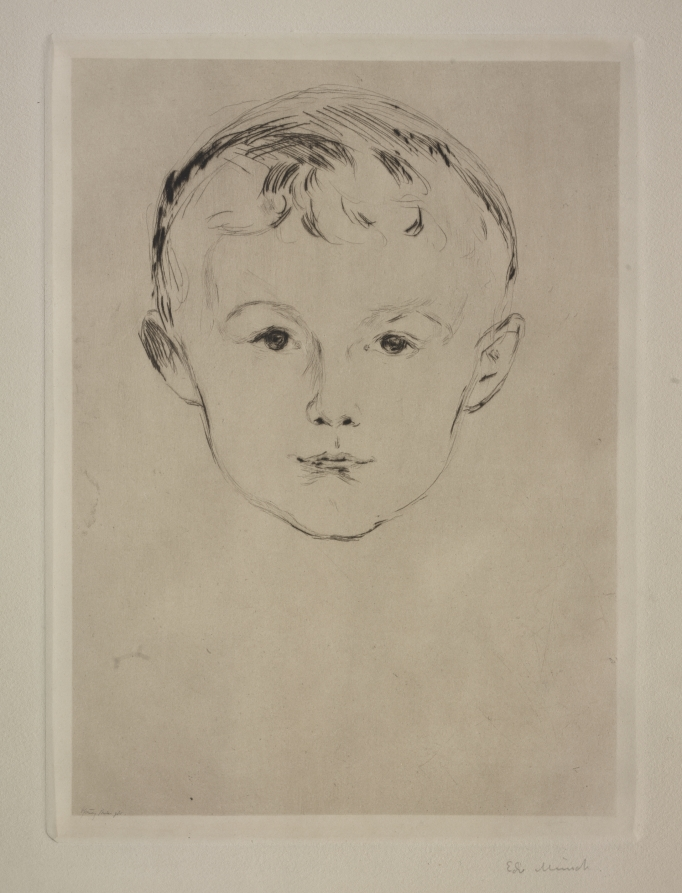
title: From Max Linde's House: Theodor Linde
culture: Norway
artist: Edvard Munch (Norwegian, 1863–1944)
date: 1902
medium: drypoint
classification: Print